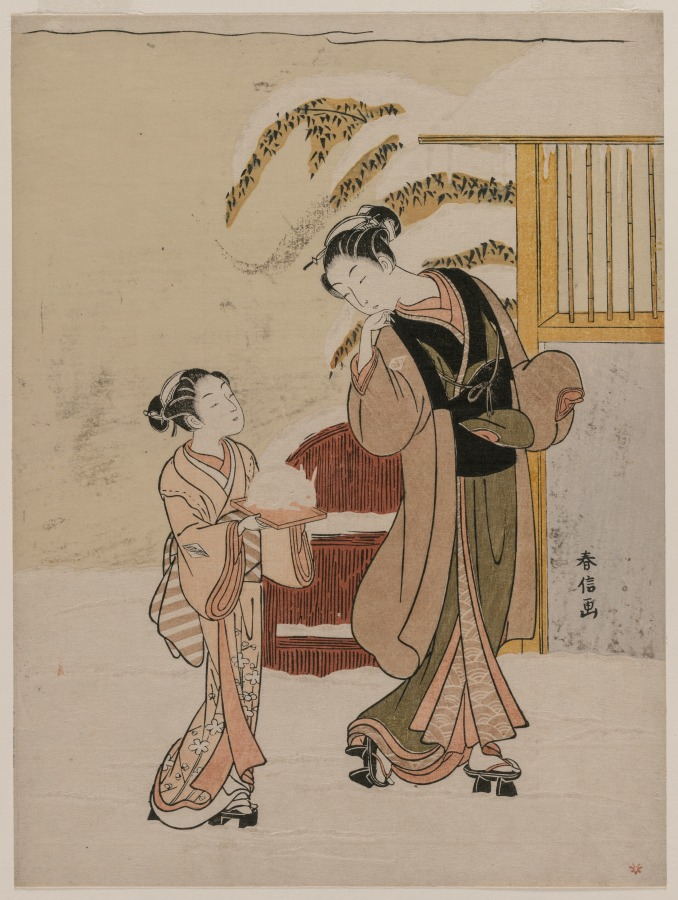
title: Young Woman Admiring a Snow Rabbit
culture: Japan, Edo period (1615–1868)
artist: Suzuki Harunobu (Japanese, 1724–1770)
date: late 1760s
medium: Woodblock print; ink, color, and embossing on paper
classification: Print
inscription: 春信画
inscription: Collector's mark: Vever